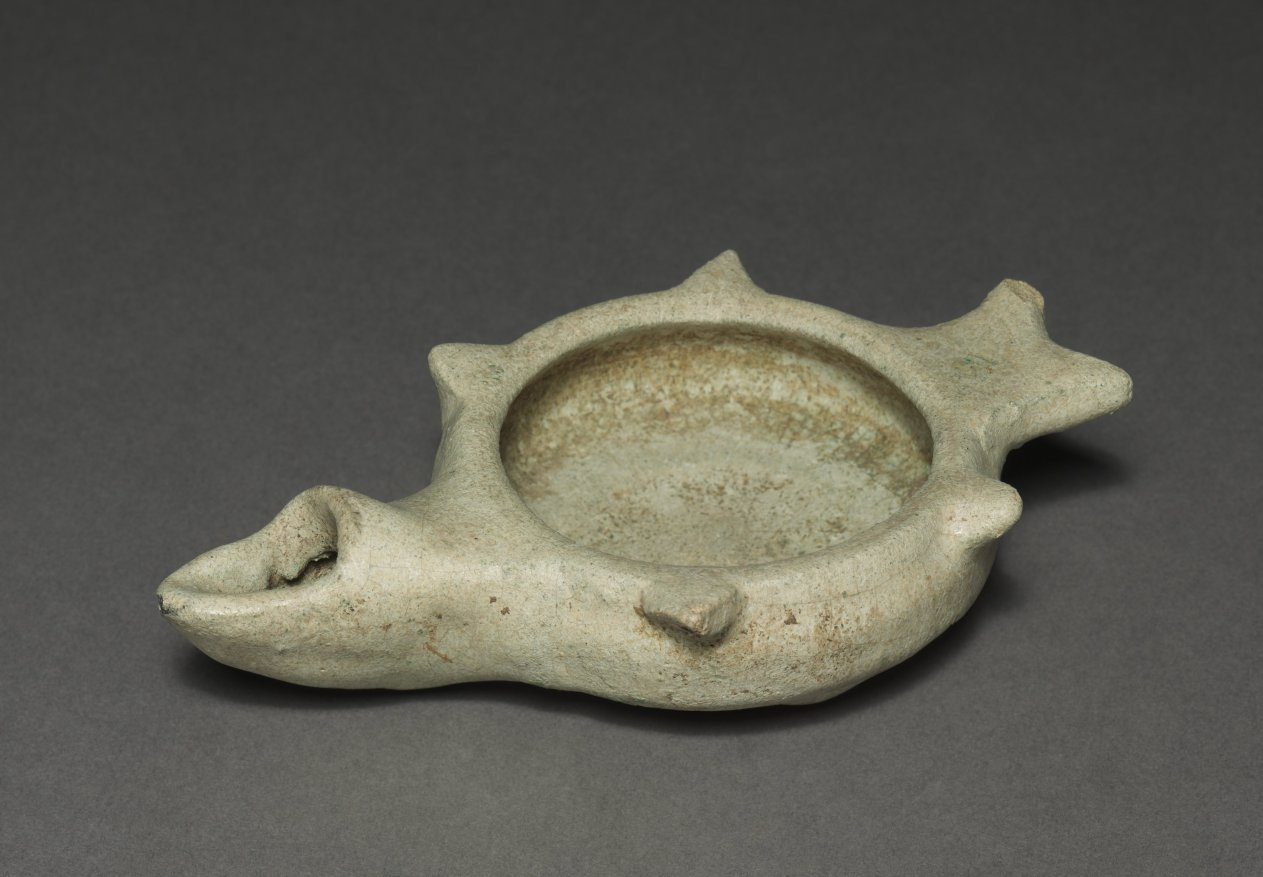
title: Lamp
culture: Parthian Empire (247 BCE–224 CE)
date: 1–200 CE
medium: terracotta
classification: Ceramic